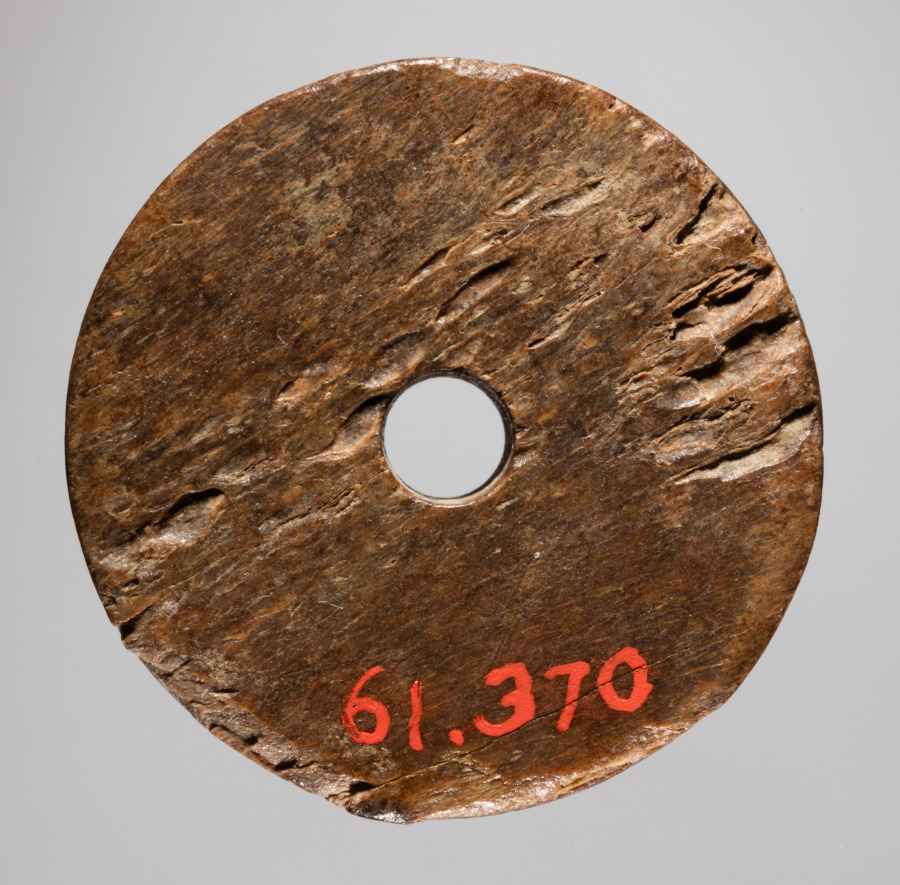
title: Spindle Whorl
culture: Iran, early Islamic period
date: 700s - 900s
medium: bone, incised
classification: Spindle Whorl